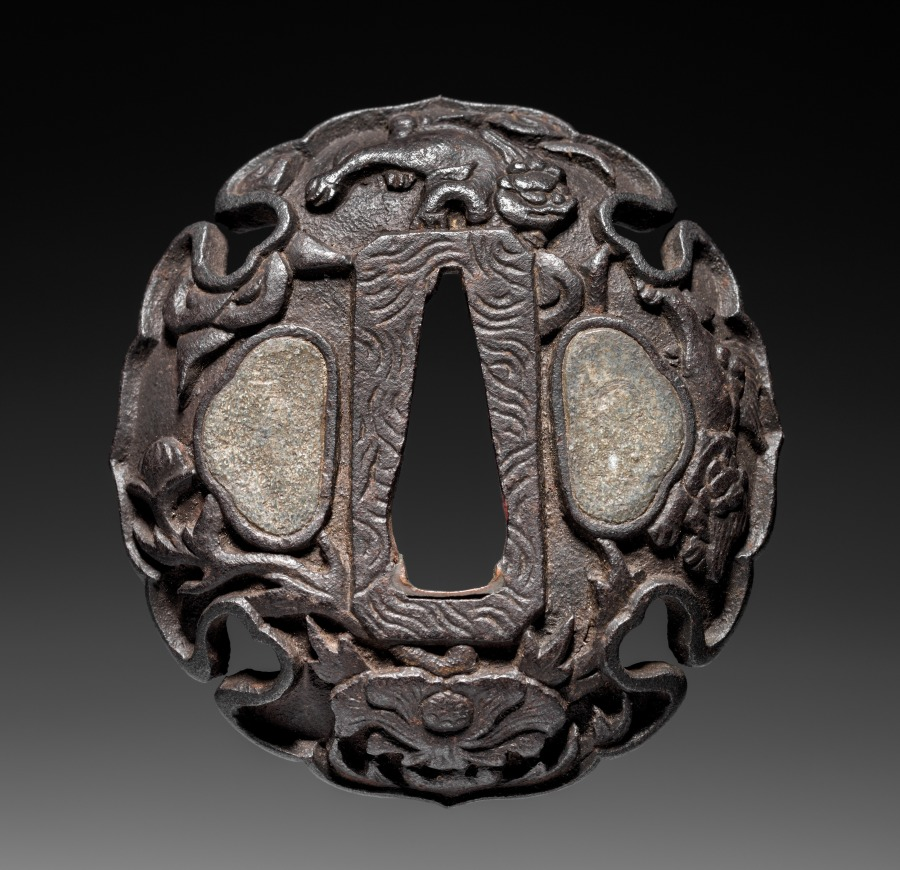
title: Sword Guard (Tsuba) with Lions in Peonies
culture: Japan, possibly Edo period (1615-1868)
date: c. 1615–1868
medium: iron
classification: Arms and Armor